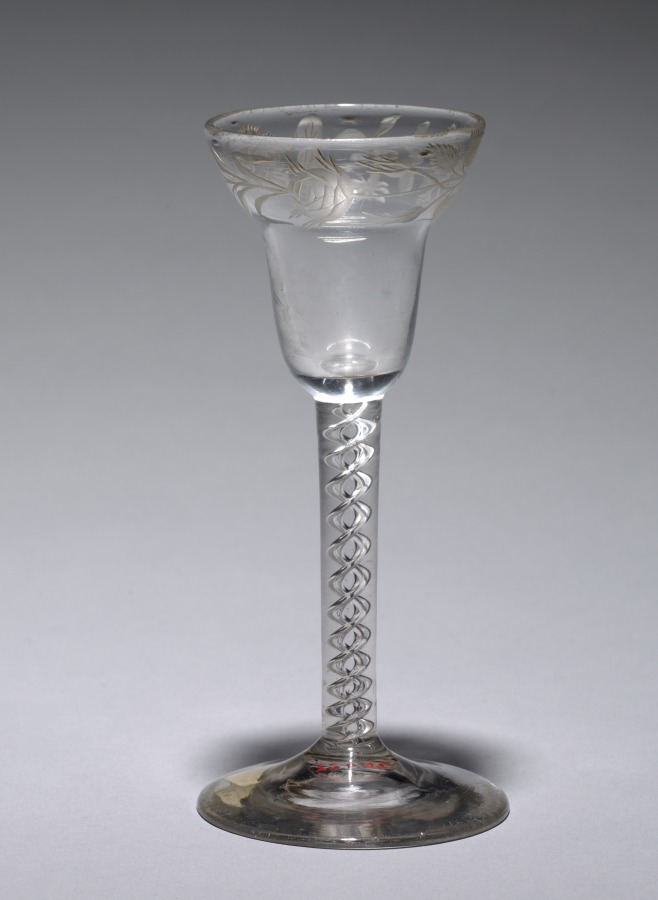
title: Wine Glass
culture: England, 18th century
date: 1750–1799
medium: glass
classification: Glass